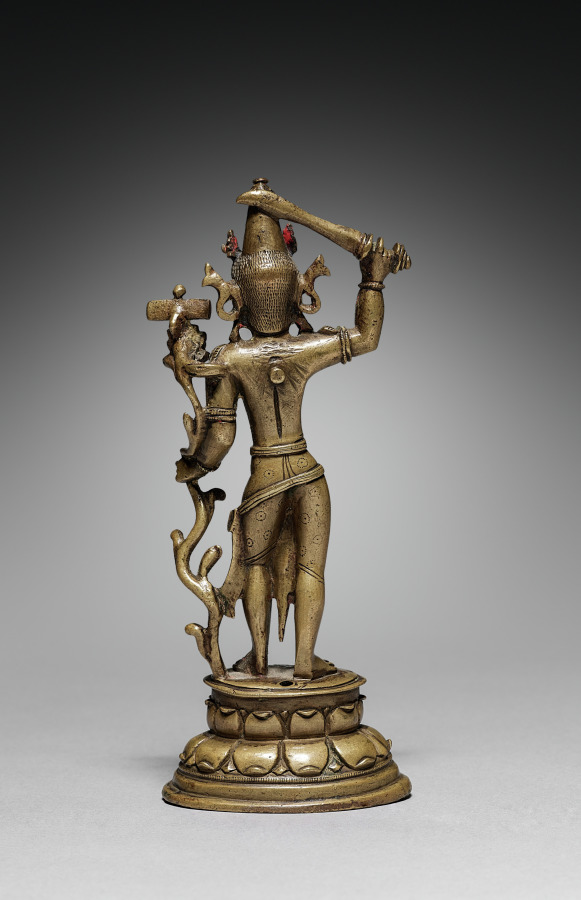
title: Standing Manjusri (Arapacana Form)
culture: India, Pala, 12th-13th century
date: 1100s-1200s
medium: bronze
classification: Sculpture